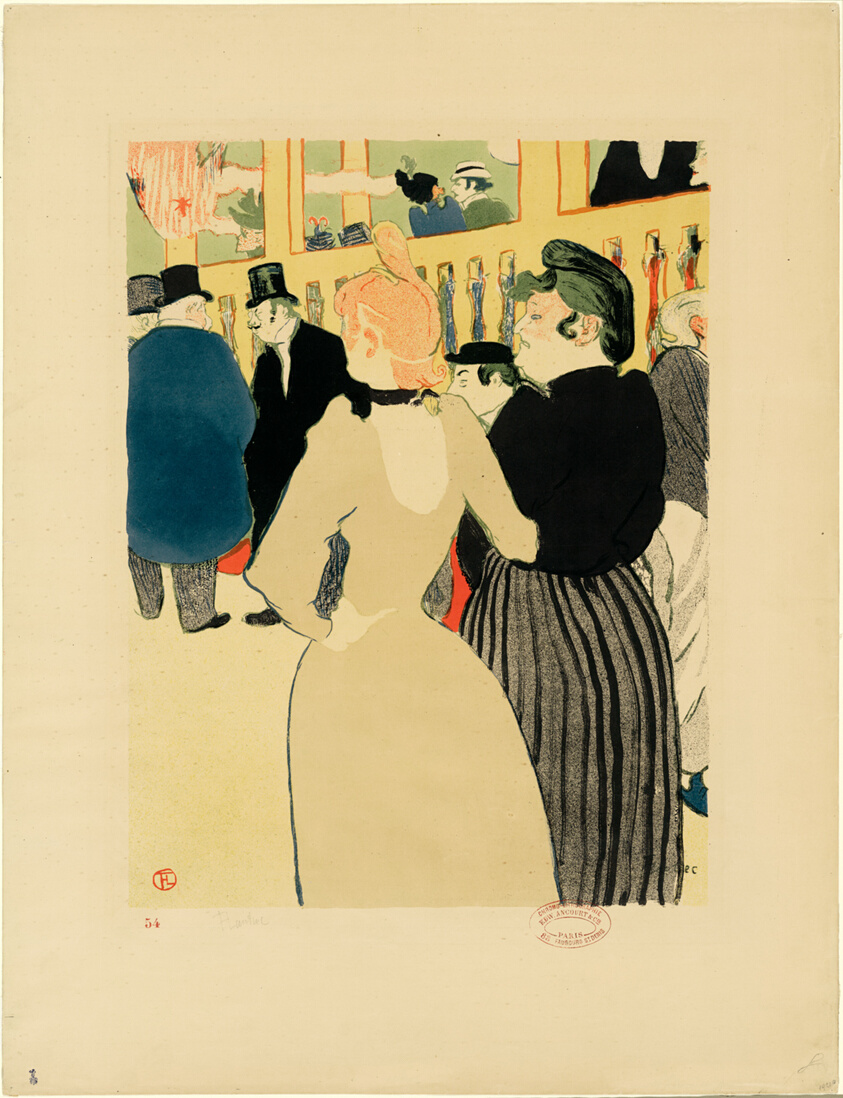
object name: Print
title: At the Moulin Rouge, La Goulue and Her Sister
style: Post-Impressionism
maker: Henri de Toulouse-Lautrec (French, 1864-1901)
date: 1892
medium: Color lithograph on tan wove paper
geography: France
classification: lithograph; print; prints and drawing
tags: men, women, leisure